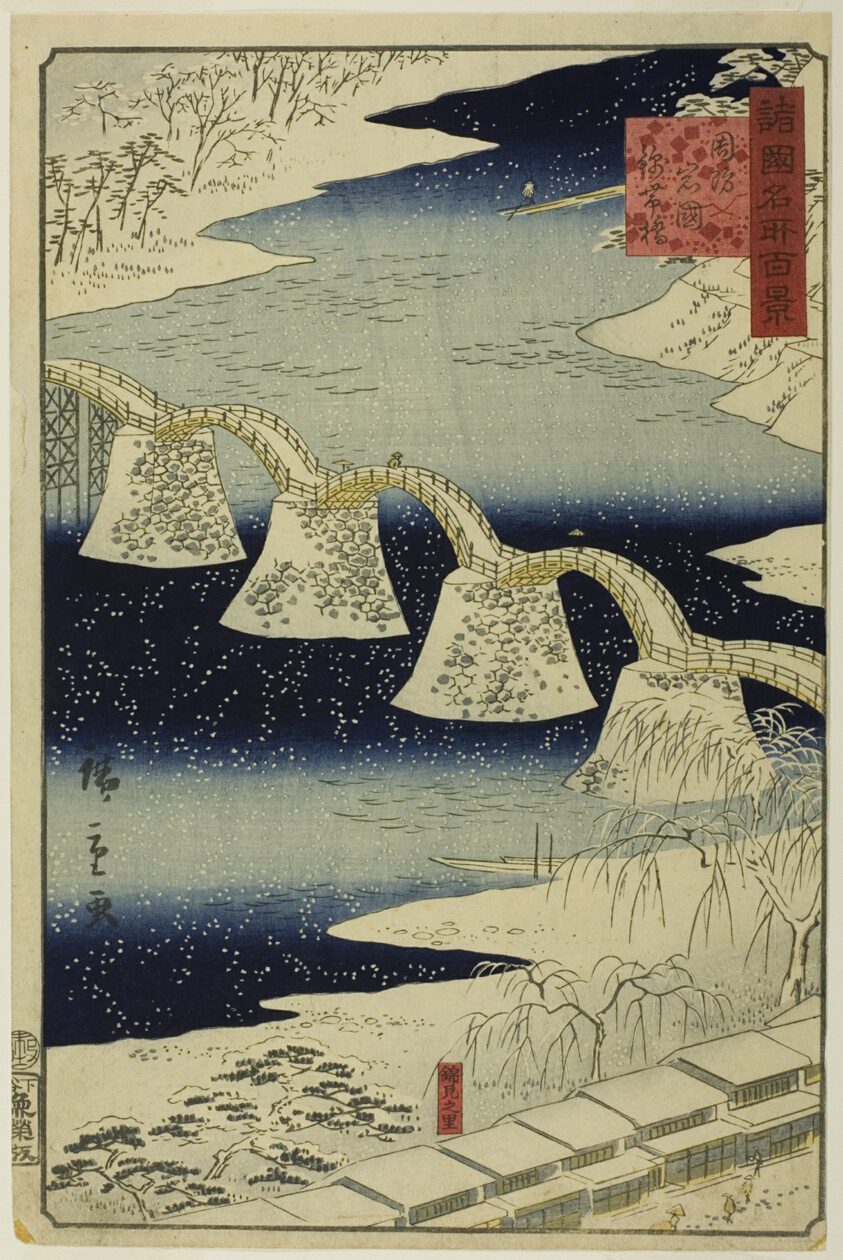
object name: Print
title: Kintai Bridge at Iwakuni, Suo (Boshu) Province from the series “One Hundred Famous Views of the Various Provinces”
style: Japanese (culture or style)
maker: Utagawa Hiroshige II (Shigenobu) (Japanese, 1826–1869)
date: 1859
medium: Color woodblock print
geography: Japan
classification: woodblock print; print